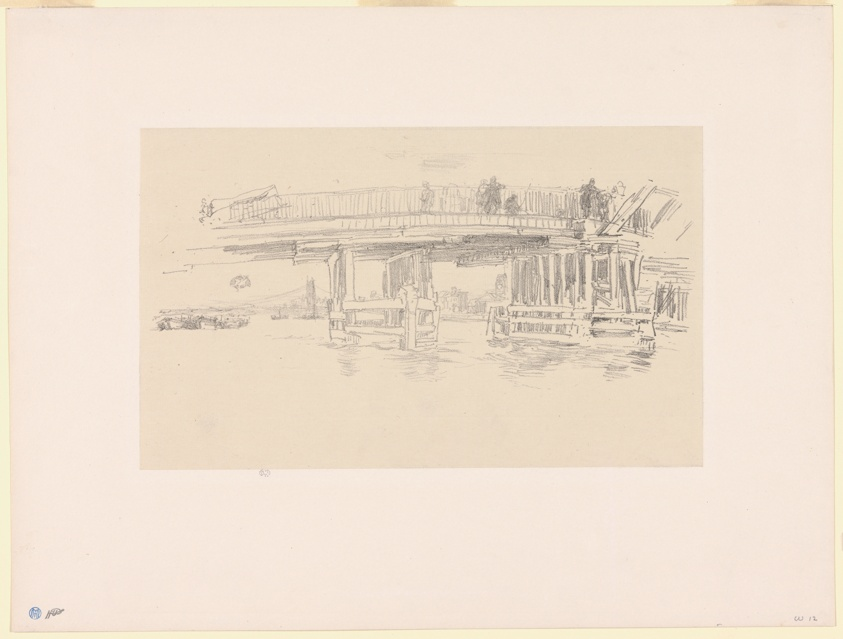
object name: Print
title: Old Battersea Bridge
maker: James McNeill Whistler (American, 1834-1903)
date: 1879, published 1887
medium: Lithograph, in black ink, with scraping, on cream chine, laid down on off-white plate paper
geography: United States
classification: lithograph; print; prints and drawing; paper